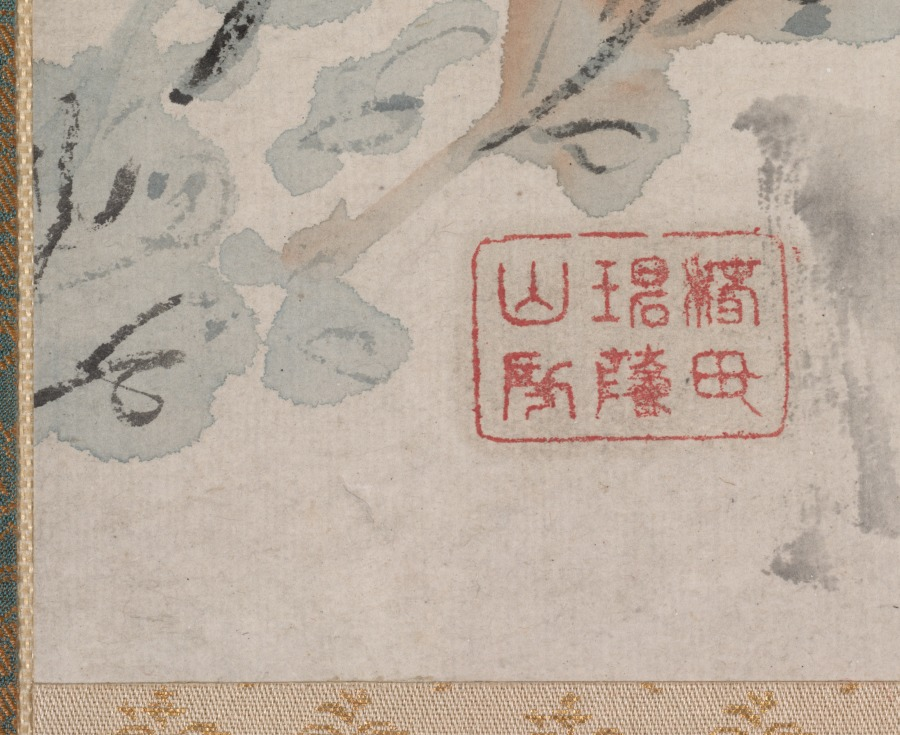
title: Banana Plant and Chrysanthemum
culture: Japan, Edo period (1615–1868)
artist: Tsubaki Chinzan (Japanese, 1801–1854)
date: c. 1820–54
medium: hanging scroll; ink and color on paper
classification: Painting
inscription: artist's inscription and two seals middle right side.